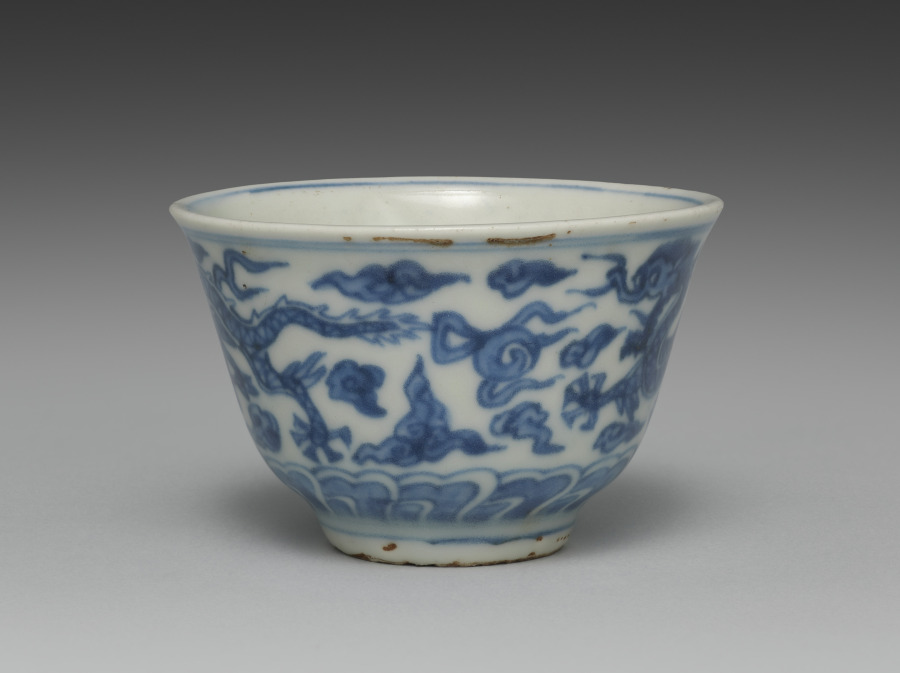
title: Cup from Tea Cups with Dragons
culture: Japan, Edo period (1615–1868)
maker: Seifū Yohei I (Japanese, 1801–1861)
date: 1840s–57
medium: One from a set of five tea cups; porcelain with underglaze blue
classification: Ceramic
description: Seifū Yohei I made both blue and white porcelains after Ming dynasty (1368–1644) Chinese wares fired in the kilns at Jingdezhen for export. He also made colorful stoneware in the style of his teacher, Nin’ami Dōhachi (Takahashi Dōhachi II) (1783–1855).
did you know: A small figure of an elephant serves as the handle for the lid.